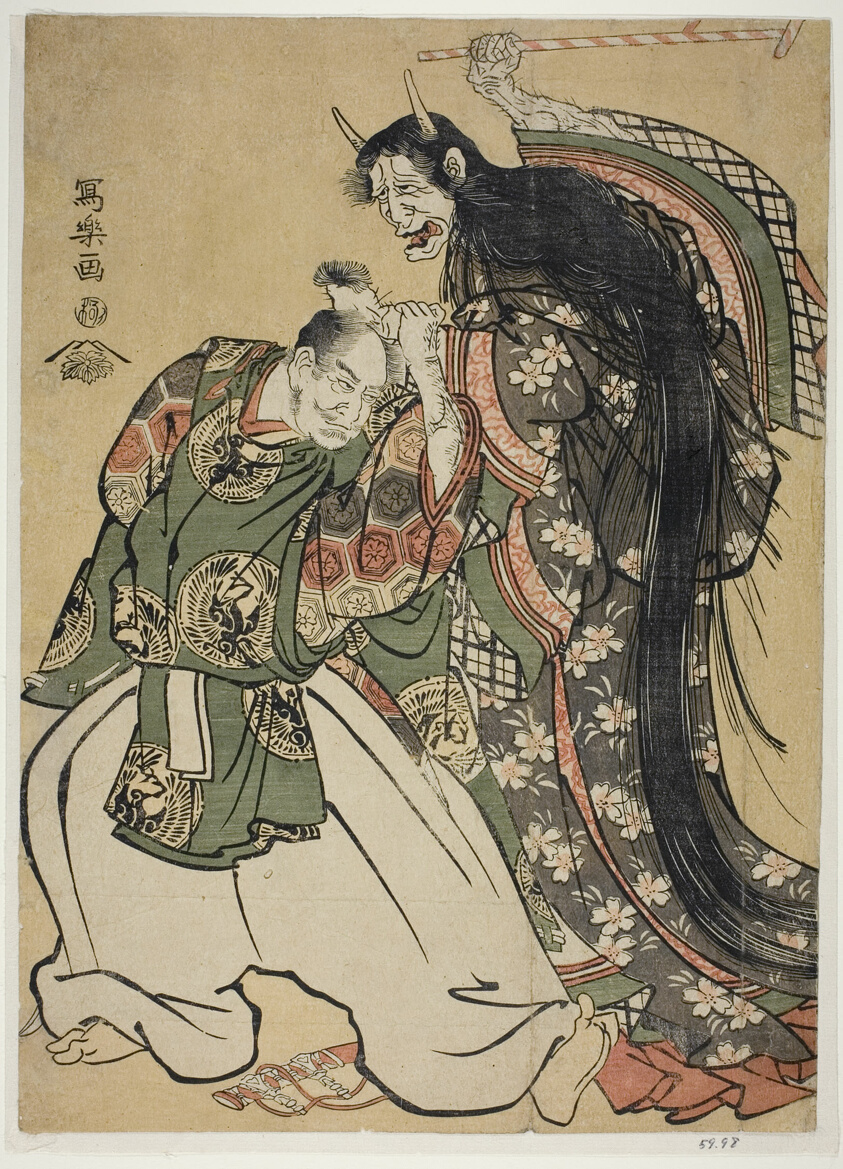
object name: Print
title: Maple Leaf Viewing (Momiji gari)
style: Japanese (culture or style)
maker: Toshusai Sharaku 東洲斎 写楽; Japanese, active 1794-95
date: 1794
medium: Color woodblock print; aiban, nishiki-e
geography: Japan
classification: woodblock print; print; asian art